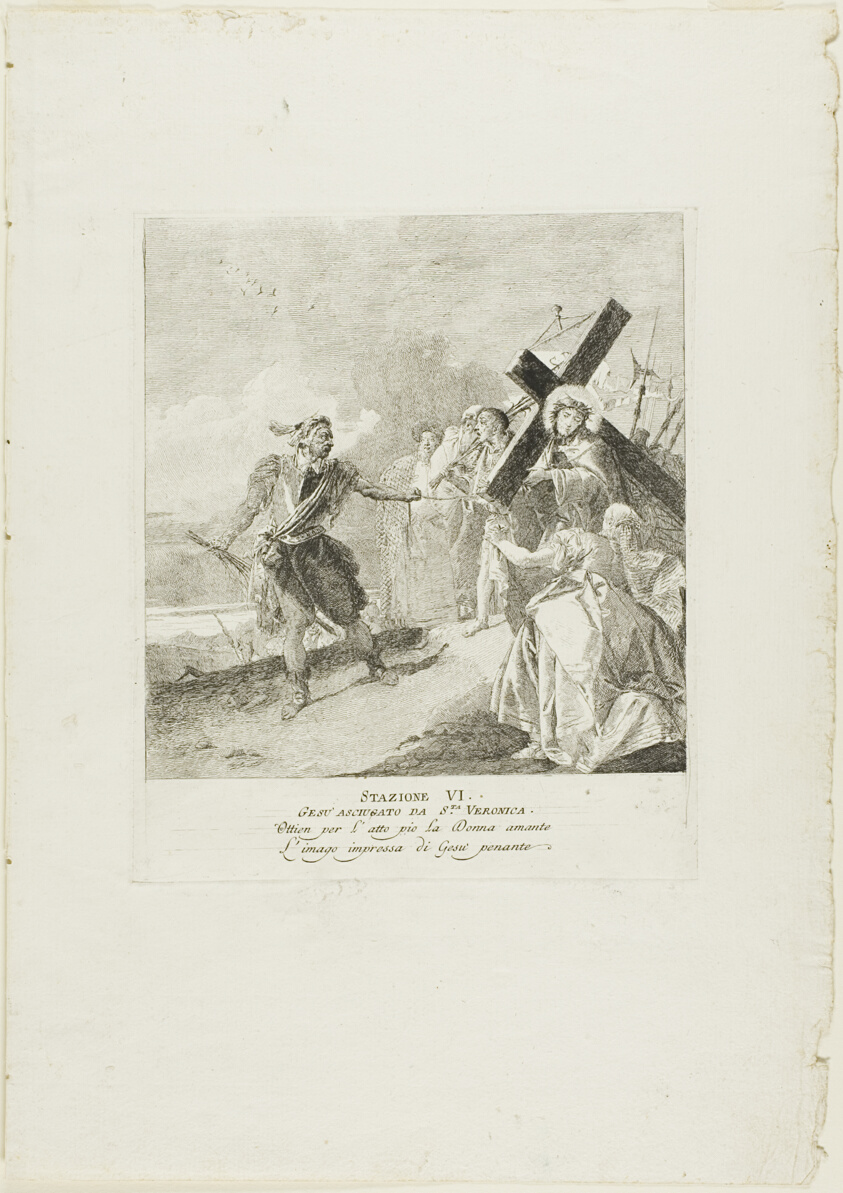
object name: Print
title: Christ's Face is Wiped by St. Veronica, plate six from Stations of the Cross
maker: Giovanni Domenico Tiepolo (Italian, 1727-1804)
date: c. 1748, published 1749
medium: Etching on paper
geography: Italy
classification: etching; print; prints and drawing